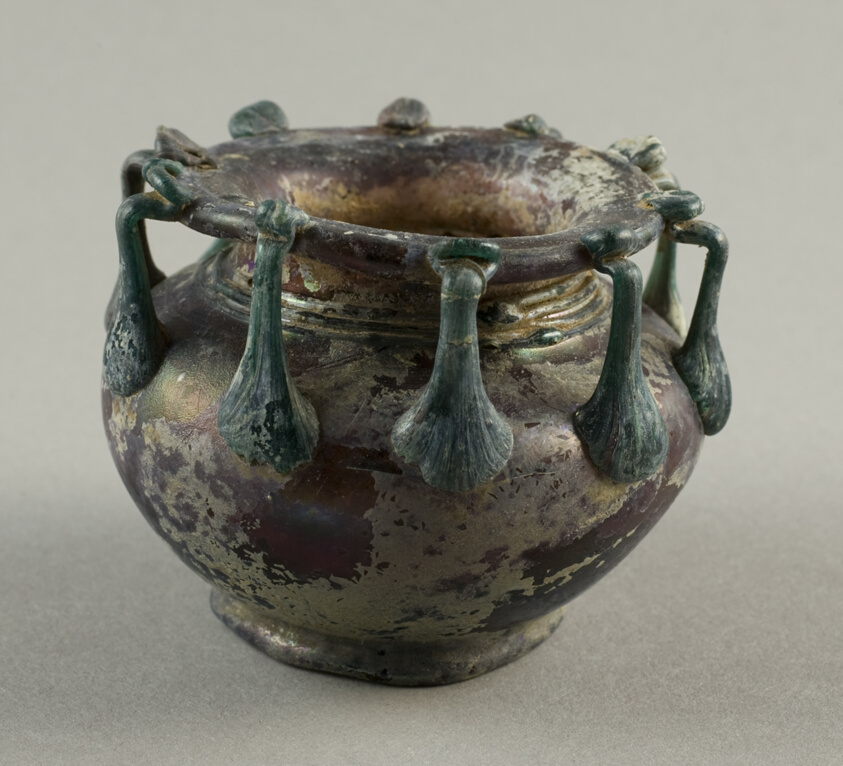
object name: Vessel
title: Jar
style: syrian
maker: Roman; Eastern Mediterranean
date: 3rd-5th century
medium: Glass, blown technique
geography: Syria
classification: vessel; glass; ancient art